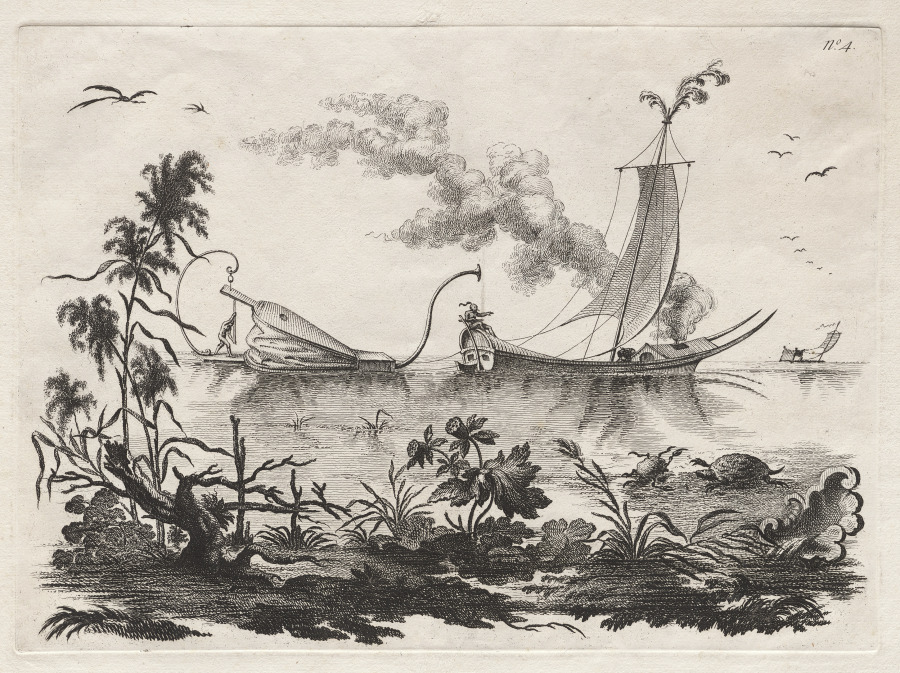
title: The Manner of sailing by the power of Bellows practiced on that Planet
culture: Italy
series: Suite of the Most Notable Things Seen by John Wilkins Erudite English Bishop during his Famous Voyage from the Earth to the Moon … dedicated to Sir William Hamilton ambassador to the Court of Naples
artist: Filippo Morghen (Italian, 1730–after 1807)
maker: possibly after Jean-Pierre-Louis-Laurent Hoüel (French, 1735–1813)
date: c. 1769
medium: etching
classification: Print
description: Filippo Morghen’s set of 10 etchings is outstanding among visual narratives of imaginary voyages to the moon, both visual and literary, that intrigued 18th-century European audiences. A title page and nine plates depict the imagined lives and economy of moon dwellers. These include modes of transport such as large birds and sailboats propelled by giant bellows, enormous scissors for capturing wild beasts (including an oversized rat), and the use of giant pumpkins as fishing boats and as dwellings. Representations of the moon dwellers are based on inaccurate and imaginary European interpretations of Asian, Ottoman, and Native American cultures—called chinoiserie and turquerie—that permeated the decorative and visual arts of the period.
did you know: Morghen based this print series on three books dedicated to moon exploration, including Bishop Francis Godwin’s, Man in the Moone, 1640.